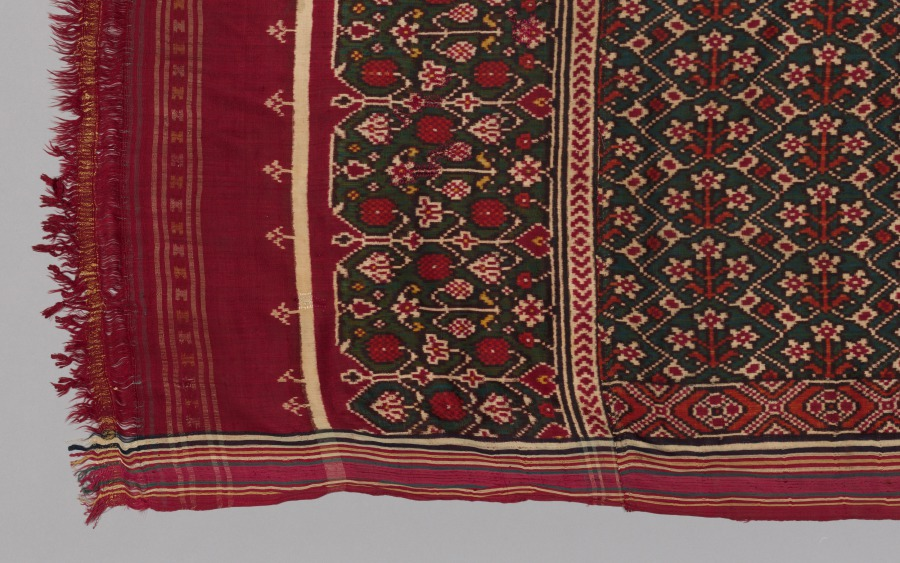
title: Silk Patolu Sari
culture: India, Gujarat, 19th century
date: 1800s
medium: tabby weave, double ikat; silk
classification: Textile